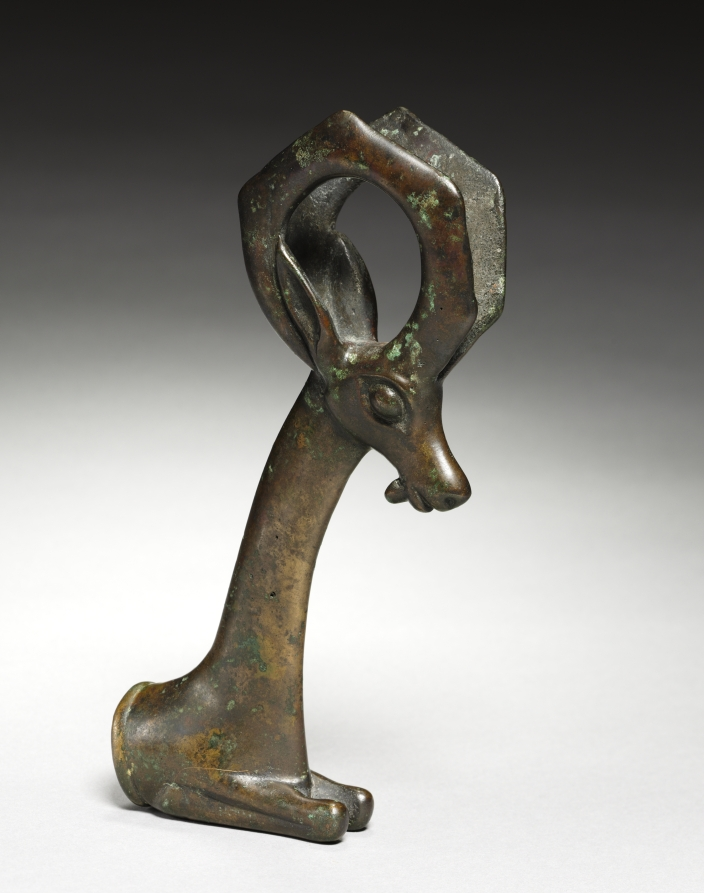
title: Ibex Whetstone Handle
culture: Iran, Luristan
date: 1100–900 BCE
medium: bronze, cast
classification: Sculpture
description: For millennia, whetstones have been used for sharpening various kinds of metal blades. They were particularly important in Luristan, a center that produced bronze blades.